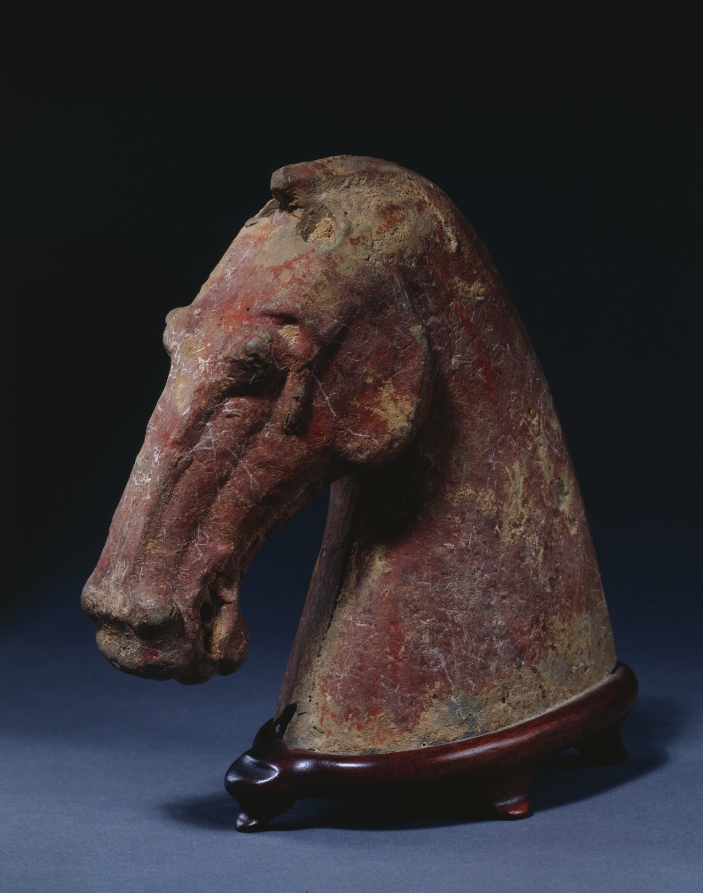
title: Horse's Head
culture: China, Han dynasty (202 BCE–220 CE)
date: 206 BCE–220 CE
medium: earthenware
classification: Sculpture